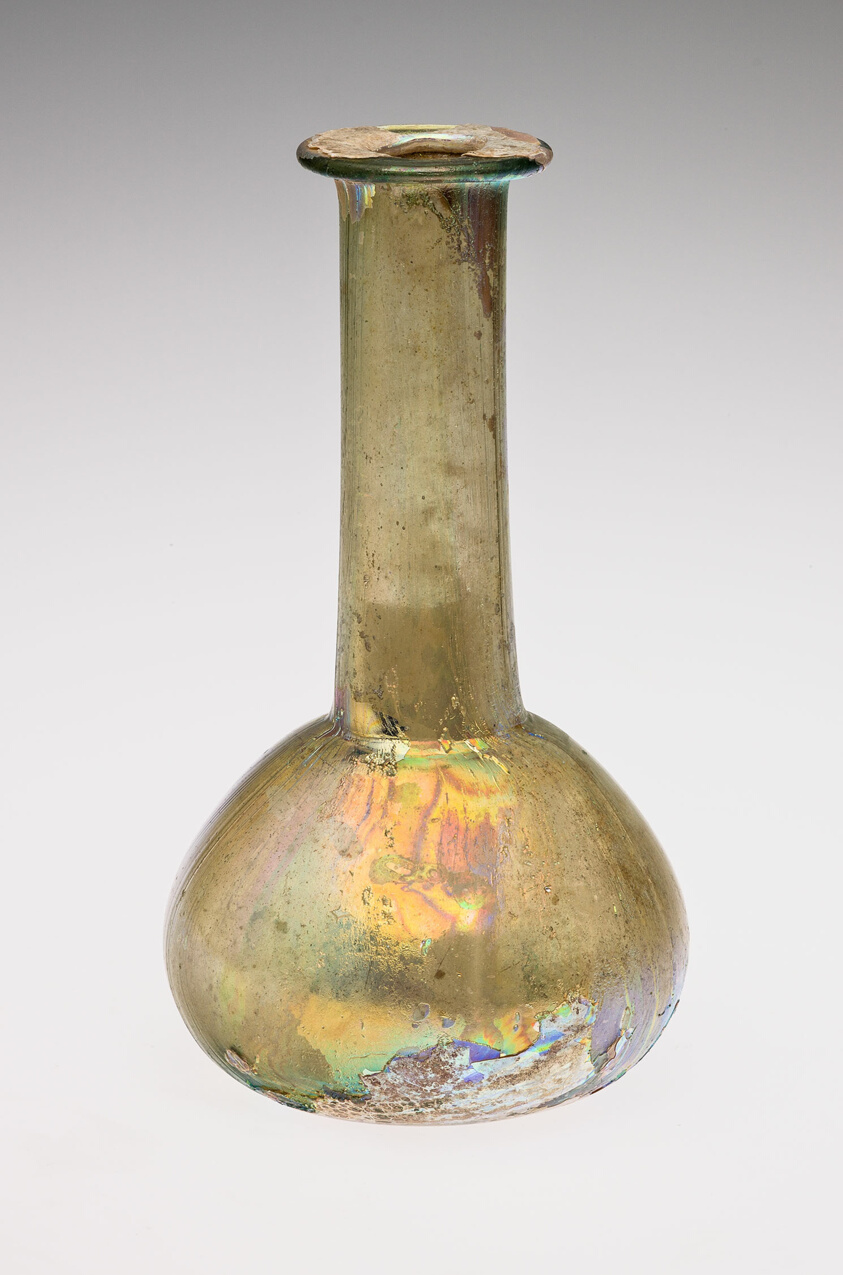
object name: Vessel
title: Bottle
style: roman (ancient, style or period)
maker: Roman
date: 2nd-3rd century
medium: Glass, core-formed technique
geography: Roman Empire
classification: bottle; vessel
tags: bottles